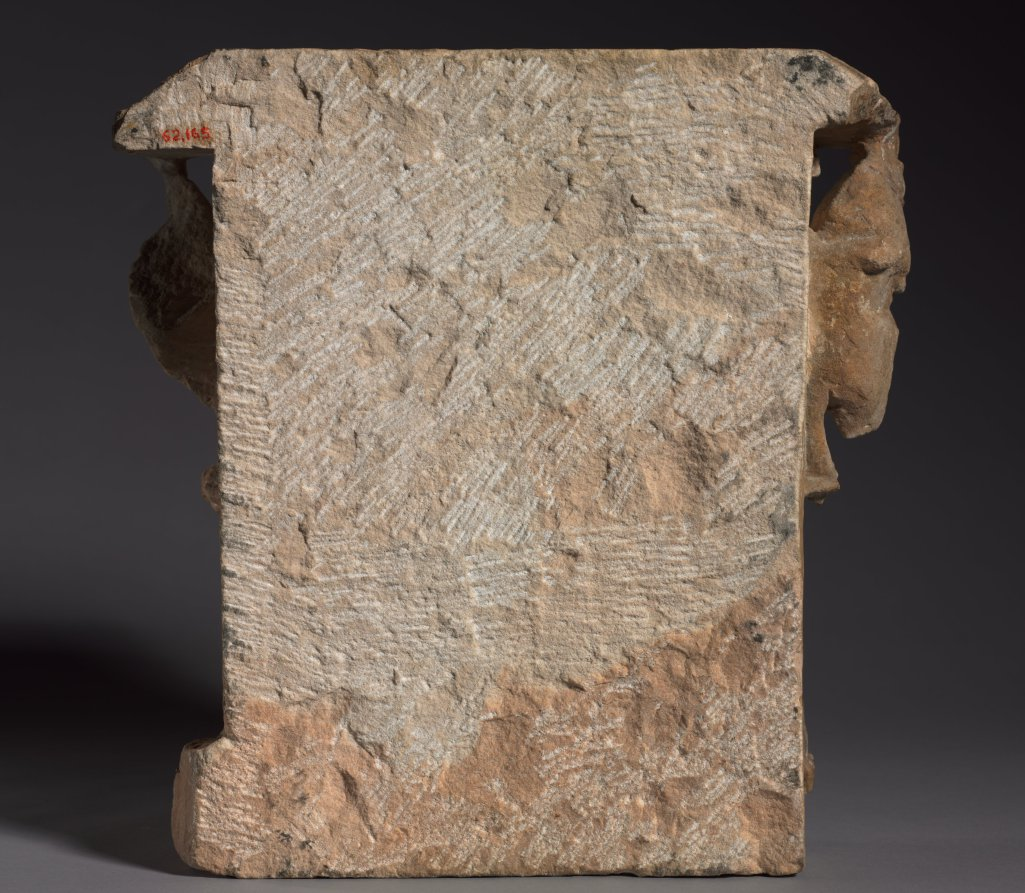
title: Lovers (Mithuna)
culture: Northwestern India, Rajasthan, Sikar, Harshagiri, Pratihara Dynasty, 10th Century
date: c. 973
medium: sandstonewith limestone wash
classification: Sculpture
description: Along with the adjacent architectural frieze with dancer and musicians, this tender scene was built into the exterior wall of the now ruined Purana Mahadeva Temple, dedicated to the Hindu god Shiva. Erotic imagery depicting couples interacting with each other in various postures were important components on the exterior of Hindu temples. They underscore the infinite beauty and abundance of the created world.